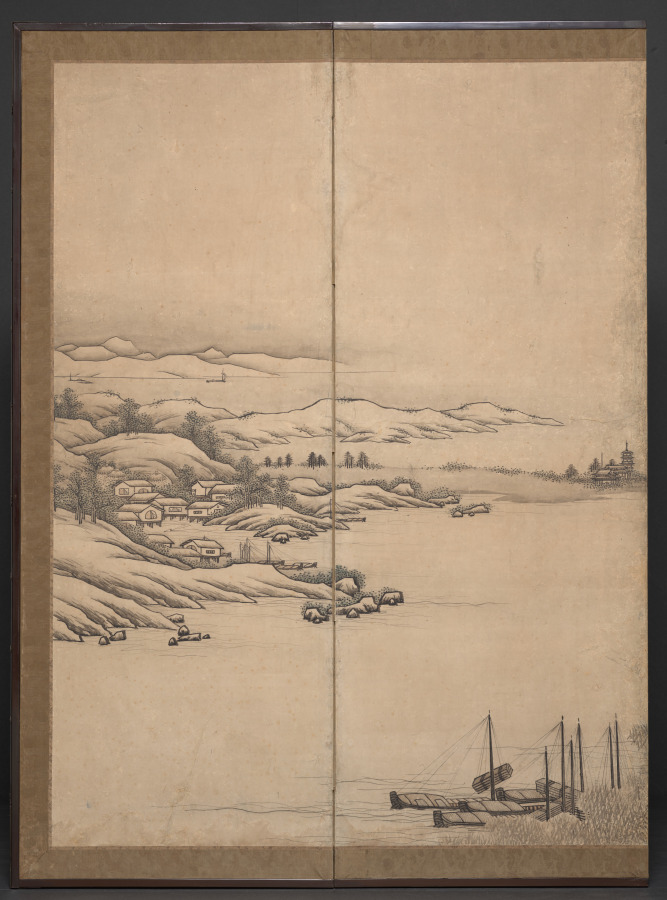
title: Chinese Pavilions in a Landscape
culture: Japan, Edo period (1615–1868)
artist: Unkoku Tōeki (Japanese, 1591–1644?)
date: 1600s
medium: Six-panel folding screen, ink and light color on paper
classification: Painting